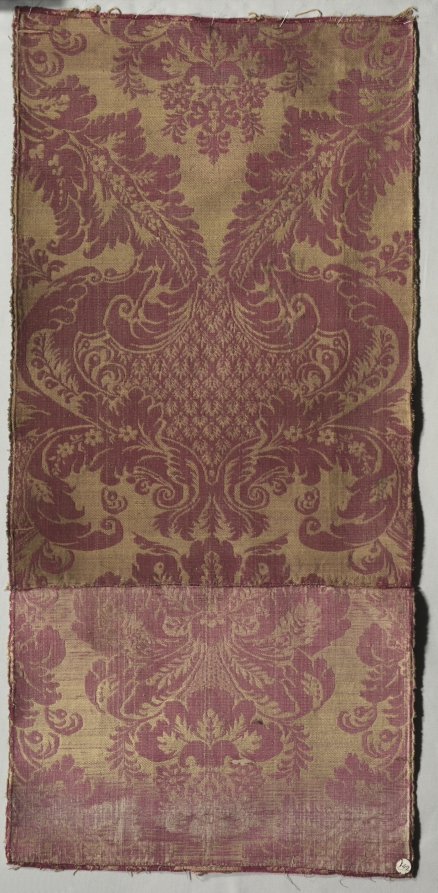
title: Length of Brocatelle Textile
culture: Italy or Spain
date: 1680–1720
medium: silk and linen: plain compound satin (brocatelle)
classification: Textile